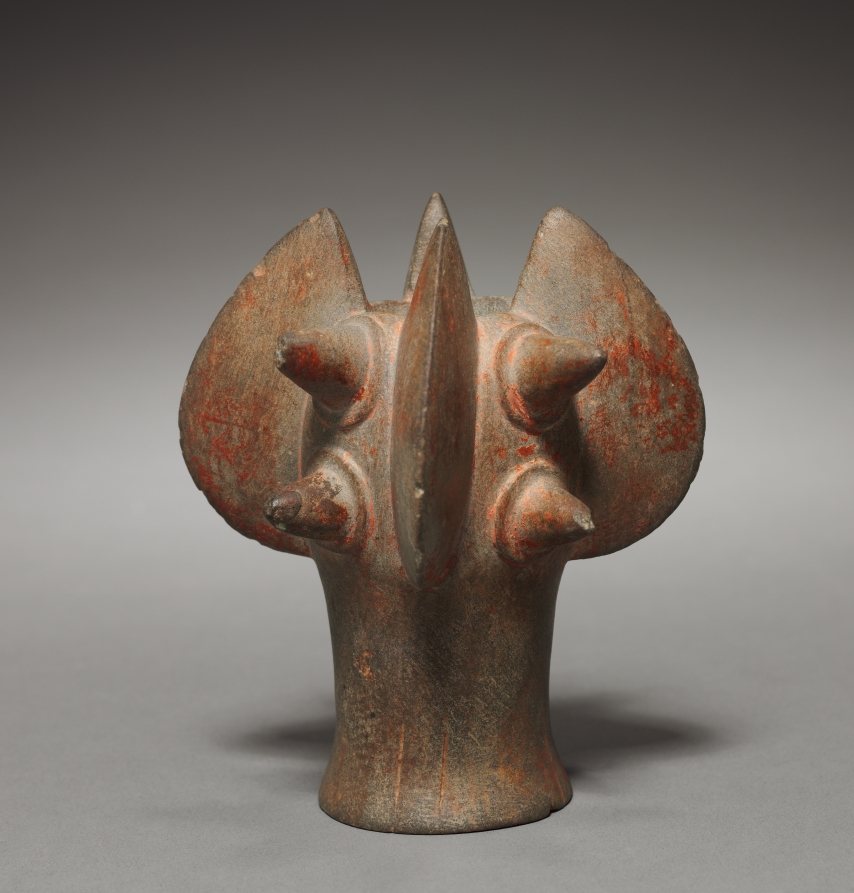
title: Mace Head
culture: North coast of Peru, Salinar culture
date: c. 200 BCE–100 CE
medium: stone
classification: Stone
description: This handsome object was slipped onto a wooden shaft to form a mace, a club-like weapon used in war. It is unclear, however, whether the ancients used examples as well carved as this one in anything but ceremonial circumstances.